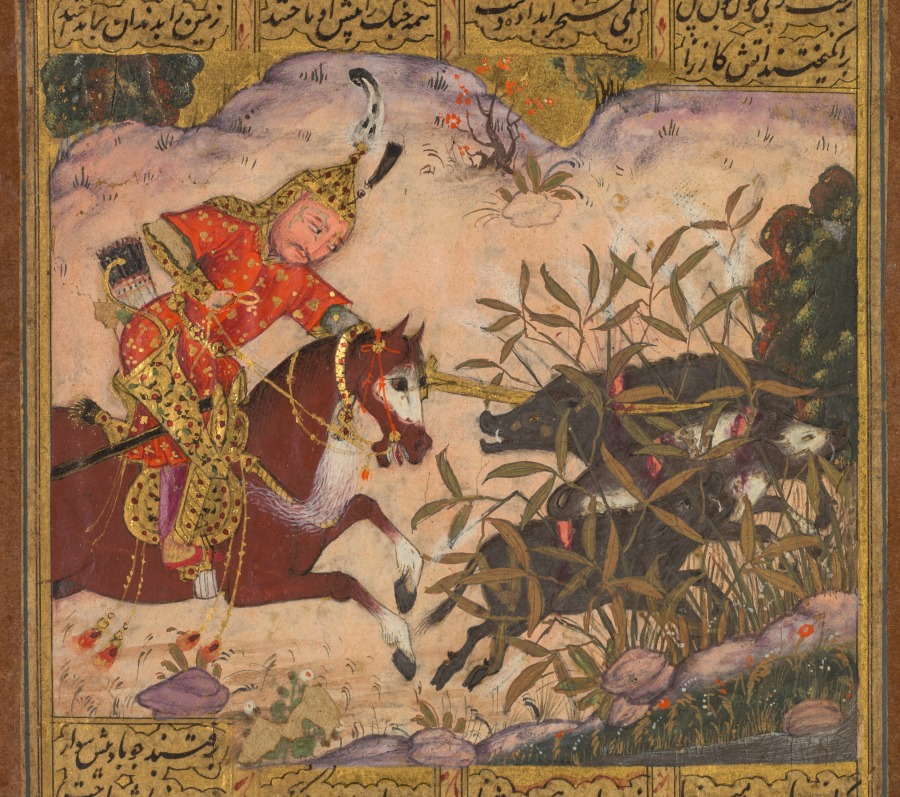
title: Bijan killing the wild boars of Irman, from a Shah-nama (Book of Kings) of Firdausi (Persian, about 934–1020), (recto)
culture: India, Bijapur, Deccan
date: c. 1610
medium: Gum tempera, ink, and gold on paper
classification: Painting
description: This illustrated page from a Shah-nama depicts the first adventure of the hero Bijan, son of an Iranian knight. When reports arrived at the king’s court of wild boars ravaging the borderlands between the enemy realms of Iran and Turan, Bijan volunteered to hunt and kill the beasts, much to the chagrin of his father, who doubted his young son’s ability to navigate the politically volatile situation. The fearless Bijan is shown on horseback as he singlehandedly strikes down on the bodies of the wild boars in the brush. After overzealously celebrating his success, Bijan must be rescued from a pit by Rustam. This early manuscript from the Deccan made for the sultan of Bijapur is characterized by glowing colors and lavish use of gold.